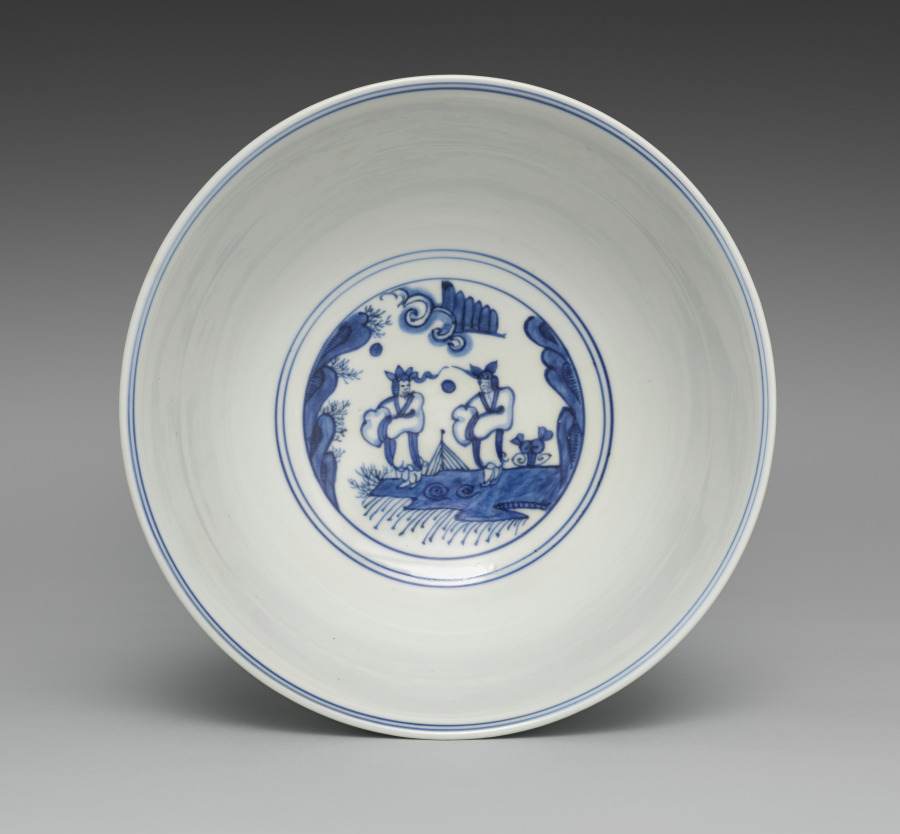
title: Bowl from Nesting Bowls with Daoist Immortals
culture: Japan, Meiji period (1868–1912)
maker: Seifū Yohei III (Japanese, 1851–1914)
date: 1893–1914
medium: Middle bowl from a set of three bowls; porcelain with underglaze blue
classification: Ceramic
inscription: 大日本清風造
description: Yohei III was capable of ink painting–like compositions in underglaze blue, as well as more decorative ones like that on this set of three nesting bowls. Bowls with very similar designs in five colors were produced in the reign of the Wanli emperor (r. 1572–1620 ) during the Ming dynasty, and Yohei must have had direct access to one of these or to a close copy. A scene of Daoist immortals is presented on the bowls. On each one, the ground plane is defined with a blue wash. Four lanterns are evenly spaced around the bowl. Two are flanked with linked-piece metalwork banners of the seven treasures. The alternate altars are adorned with textile banners. In between them are four immortals, each standing beneath a tree with small plants surrounding his feet. Two of the immortals hold fruit on a tray. Another carries an elixir-filled ewer and a willow branch. The fourth holds a swastika (manji), here an auspicious symbol, and a flower. Curiously, the inscription inside each footring reads “Made by Seifu of Great Japan,” in emulation of the dynasty and reign inscriptions that appear on Chinese ceramics; but one can also see through the translucent glaze another inscription, “Seifu Yohei,” written in large characters within a double band of blue on the largest bowl.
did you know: In the bottom of each bowl is a scene of two robed immortals who appear to stand on a precipice in a mountainous landscape high in the clouds, with celestial orbs over their heads.